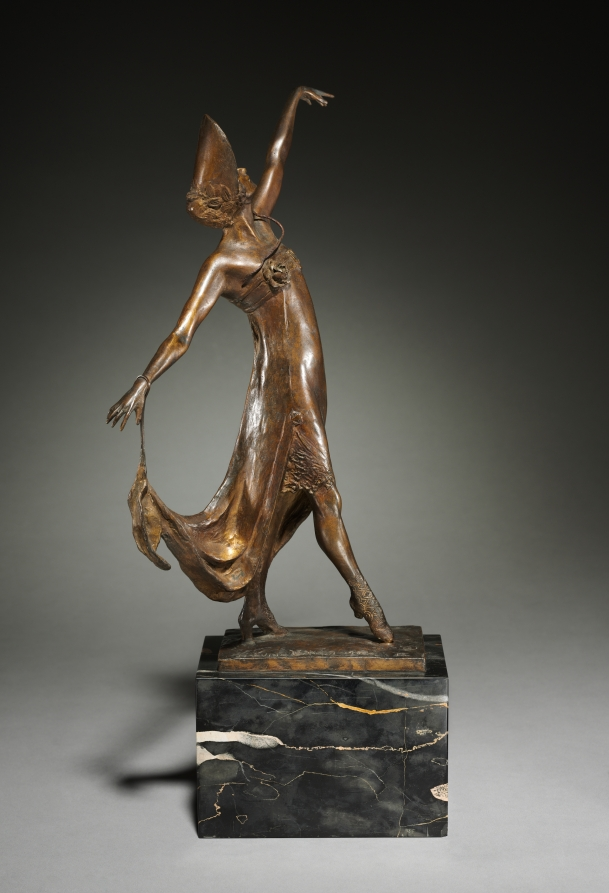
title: Pavlova Dancing the Gavotte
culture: America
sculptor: Malvina Hoffman (American, 1887–1966)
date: 1915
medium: bronze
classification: Sculpture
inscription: Signed on base: "Malvina Hoffman 1915, IX ©"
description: Sculptor Malvina Hoffman met the acclaimed Russian ballerina Ana Pavlova in New York during the spring of 1914. This bronze rendering of the dancer, posed with broadly outstretched arms, was created the following year. At the time, Pavlova was attempting to popularize a Russian version of the French folk dance known as the gavotte.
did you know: A pavlova is a meringue-based dessert inspired by the shape of ballerina Anna Pavlova's tutu.